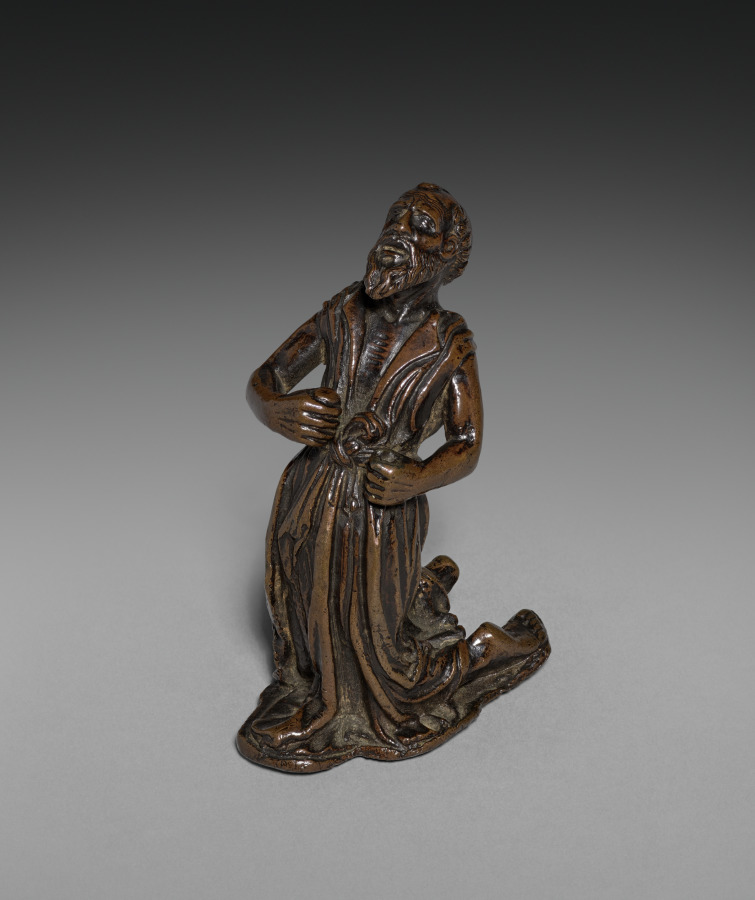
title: Kneeling Saint Jerome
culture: Italy, Ravenna, 16th century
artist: workshop of Severo da Ravenna (Italian, c.1496–c.1543)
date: c, 1525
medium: bronze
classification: Sculpture